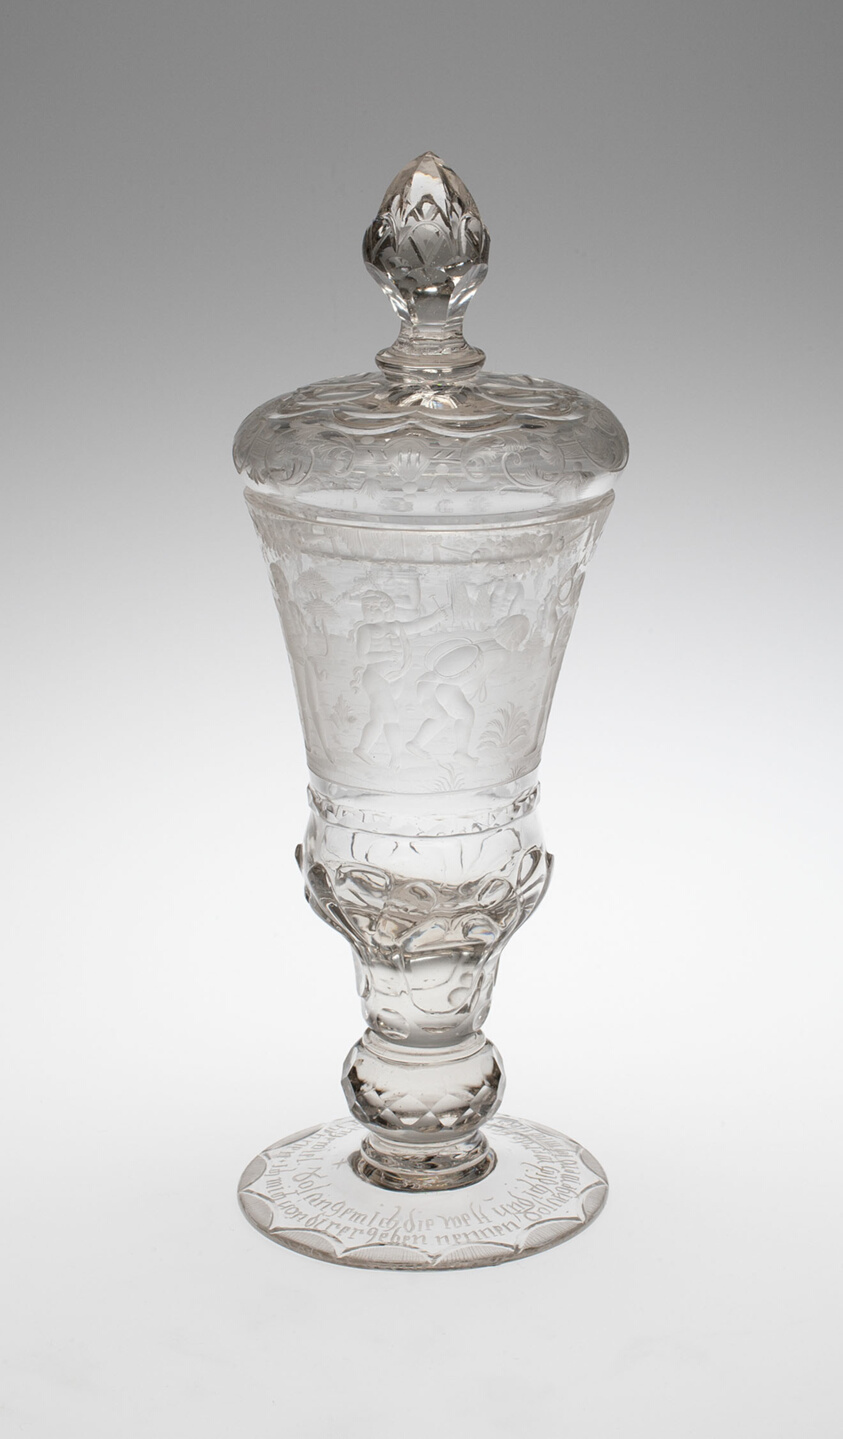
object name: Glass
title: Covered Goblet (Pokal) with Musicians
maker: Silesia, Poland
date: 1730/40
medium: Blown and molded glass with engraved decoration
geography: Silesia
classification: drinking vessel; glass; european decorative arts